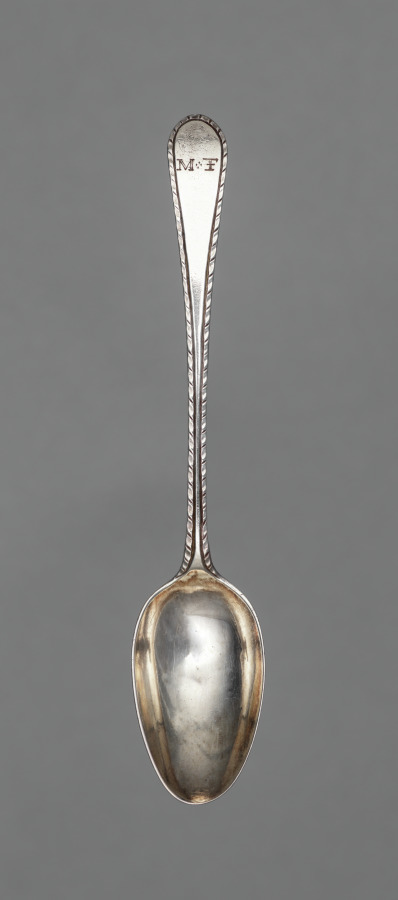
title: Teaspoon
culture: America, New Hampshire, Portsmouth, 18th century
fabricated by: Samuel II Drowne (American, 1749–1815)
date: c. 1770–1780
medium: silver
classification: Silver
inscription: engraved "M+F" in block letters on top of handle end, and "D.F.Wentworth" (later) in script on back of handle end.